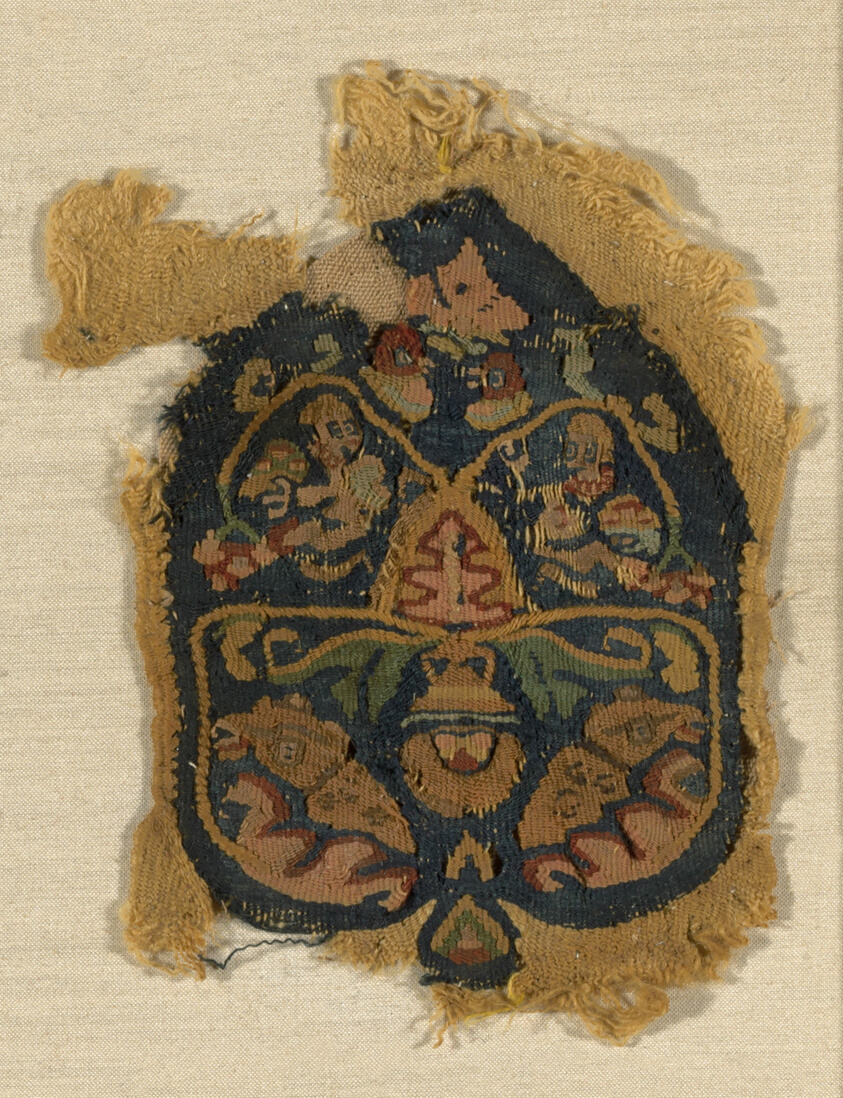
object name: Textile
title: Fragment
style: roman period (egyptian), arabian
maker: Coptic (Egypt)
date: Roman period (30 B.C.– 641 A.D.)/Arab period (641–969), 6th/8th century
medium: Linen and wool, slit tapestry weave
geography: Egypt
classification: textile; weaving